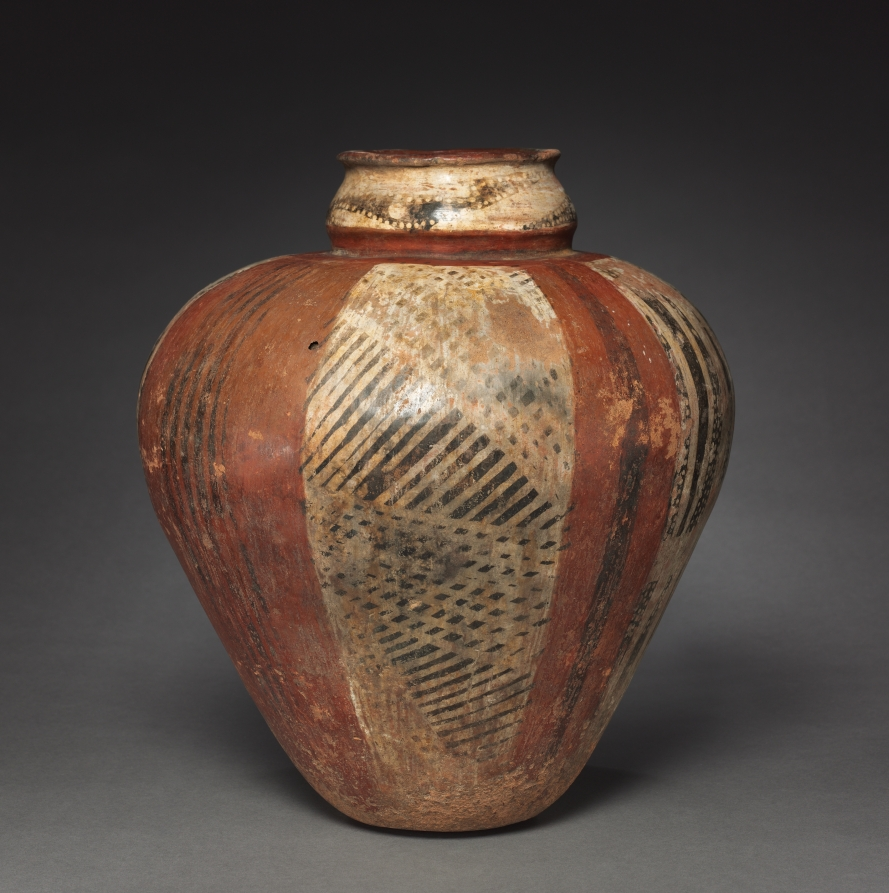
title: Jar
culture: Colombia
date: before 1550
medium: pottery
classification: Ceramic